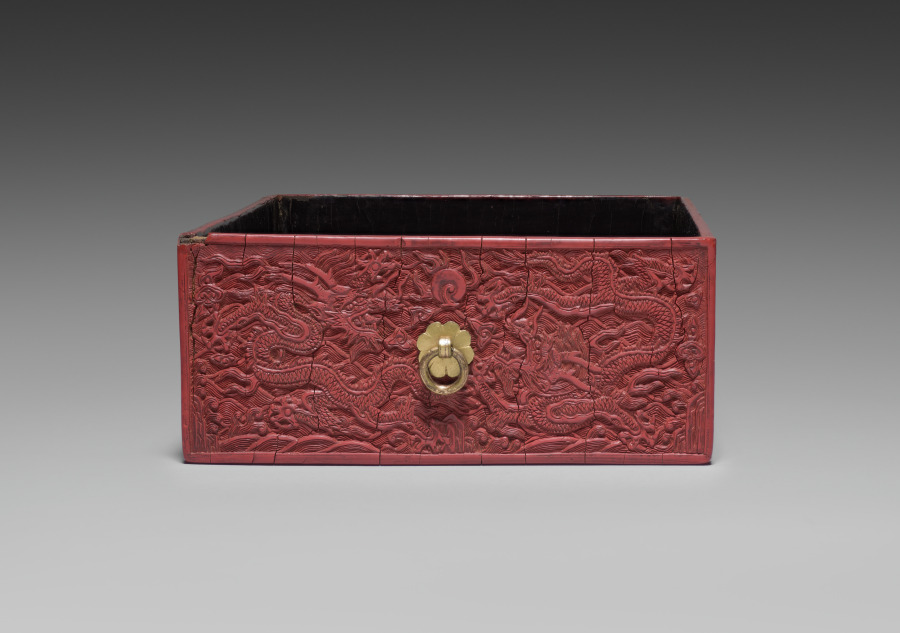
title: Drawer for a Tihong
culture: China, Ming dynasty (1368-1644), Wanli reign (1572-1620)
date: 1585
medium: carved cinnabar lacquer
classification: Lacquer